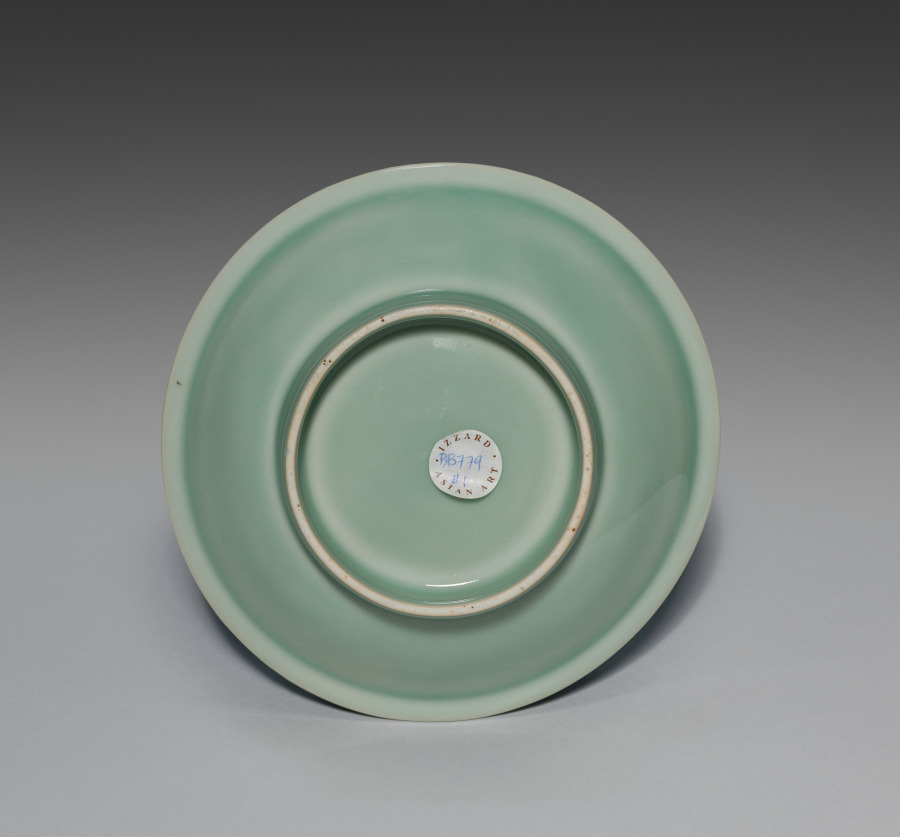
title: Small Dish (Kozara) with Waves and Reeds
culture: Japan, Edo period (1615–1868)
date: late 1600s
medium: Porcelain with underglaze blue and celadon (Hizen ware, Nabeshima type)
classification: Ceramic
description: This dish has a green glaze often called celadon in English.